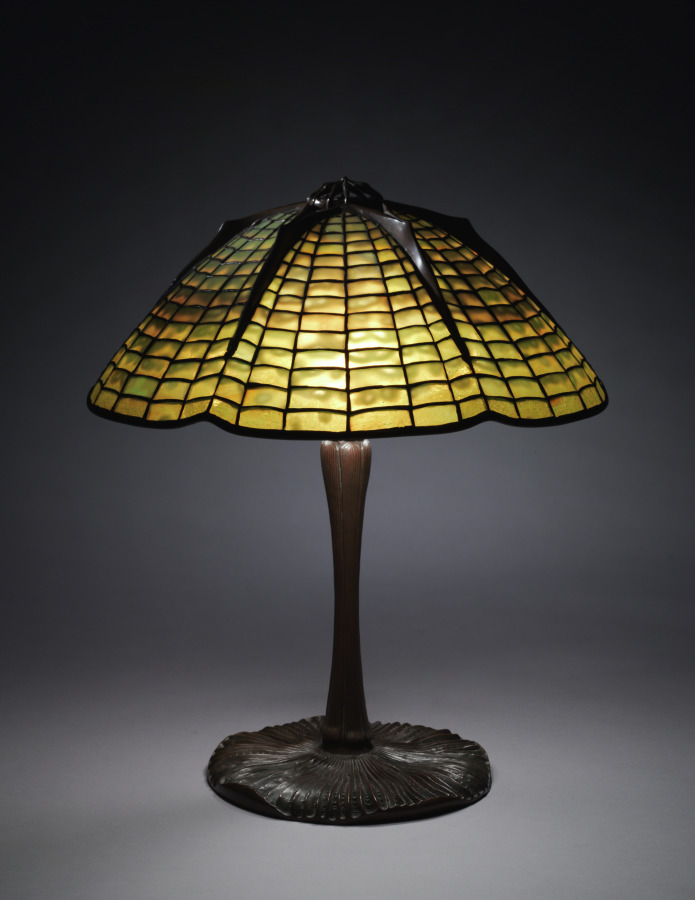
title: Spider and Web Table Lamp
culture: America, New York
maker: Tiffany Studios (United States, New York, 1902–32)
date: c. 1902–20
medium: Leaded glass, bronze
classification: Lamp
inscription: Shade impressed: TIFFANY STUDIOS NEW YORK 1424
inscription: Base impressed: TIFFANY STUDIOS/NEW YORK/337/ 2844 [scratched]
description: The dawn of the 20th century spurred fresh approaches to design. Louis Comfort Tiffany’s great contribution to this new art movement, termed the Art Nouveau, was not only the shimmering iridescence of his Favrile glass but also the naturalistic compositions of his lamps and windows, which brought him commercial and critical success in both Europe and America. Symbolic themes, such as the lurking spider in his web of this lamp, were a hallmark of Tiffany's Art Nouveau design.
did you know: The base of this lamp resembles an upturned mushroom.